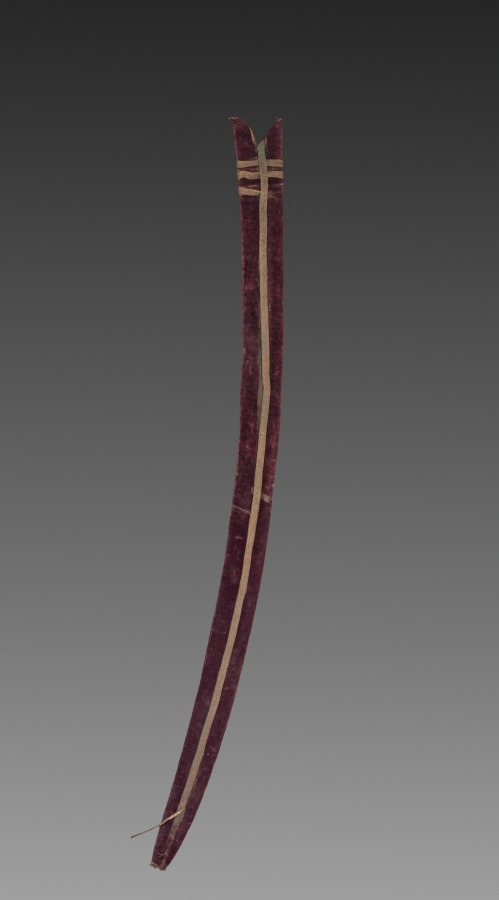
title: Tulwar Sword (case)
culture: India, probably Deccan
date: 1700s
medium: wood scabbard with velvet and metallic thread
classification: Arms and Armor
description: This long curved sword and scabbard are of the kind used and worn by Mughal nobility, as seen often in paintings. The openwork hilt is characteristic of swords from the southern Indian region known as the Deccan. By the end of the 1500s, the Mughals began making regular incursions into the Deccan as they attempted to expand their empire, increasing the exchange of art forms.